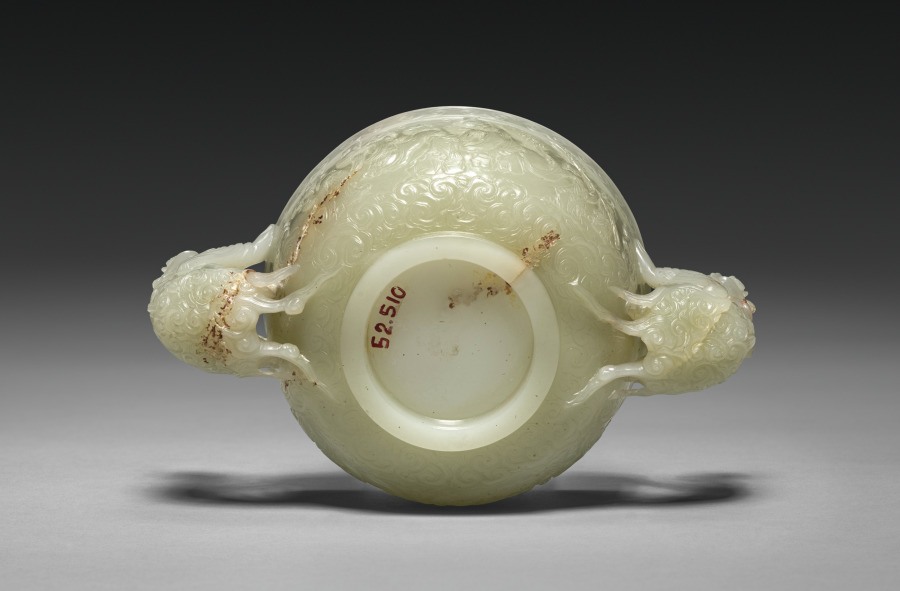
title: Cup with Daoist Figures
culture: China, Qing dynasty (1644–1911), Qianlong period (1736–95)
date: 1736–95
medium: Pale greenish-white jade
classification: Jade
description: During the Qing dynasty, Suzhou’s best products were sent north to the capital. Those that met imperial approval were sometimes graced with Qianlong’s mark, added by calligraphers and jade workers at court. The lack of a Qianlong mark on the Cleveland cup suggests that it might not have reached the court. Previously dated to the Yuan dynasty (1271–1368), new scholarship dates this cup to the Qing period.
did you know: Two female immortals serve as handles, while a Daoist procession with immortals, musicians, and attendants winds around the body of the cup.